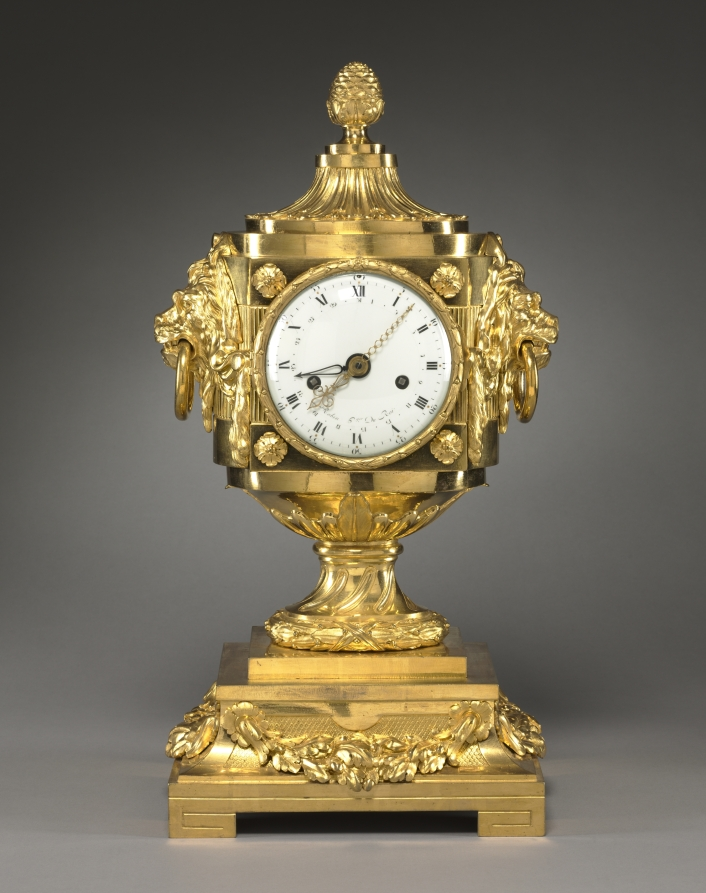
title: Clock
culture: France, 18th century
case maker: Robert Osmond (French, 1711–1789)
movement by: Robert Robin (French, 1742–1799)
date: c. 1785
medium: gilt bronze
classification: Furniture and woodwork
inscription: face of clock inscribed: "Robin ger Du Roi"